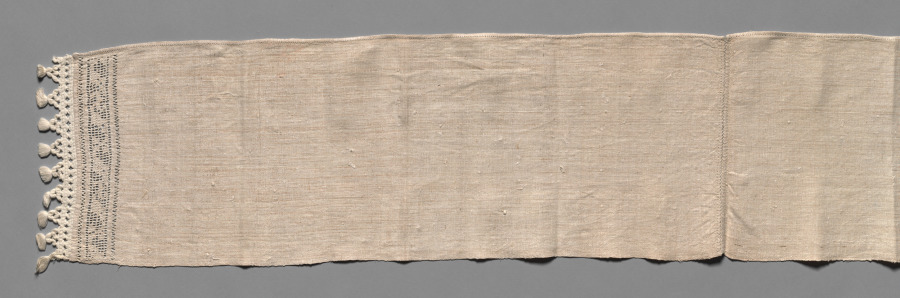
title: Towel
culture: Spain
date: 1900–1920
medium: Plain weave linen: needle lace (drawnwork); cotton: applied fringe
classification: Textile